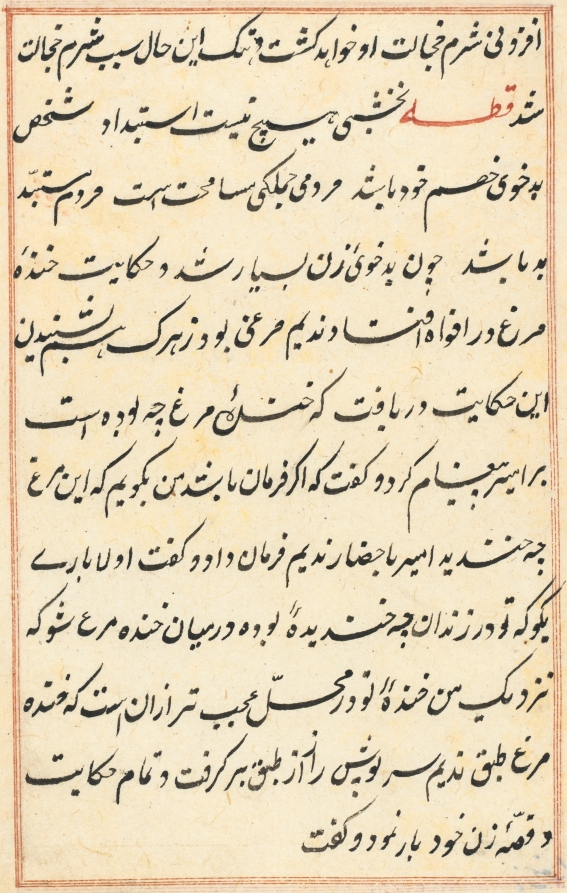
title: Page from Tales of a Parrot (Tuti-nama): text page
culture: Mughal India, court of Akbar (reigned 1556–1605)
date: c. 1560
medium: gum tempera, ink, and gold on paper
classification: Painting